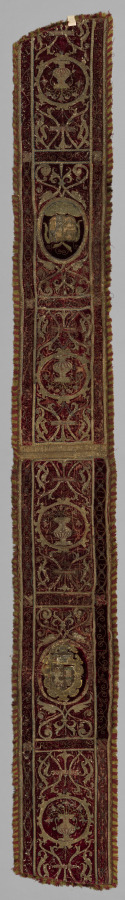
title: Embroidered Strip of Velvet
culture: Spain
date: 1500s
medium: embroidery: silk and gold thread on velvet, fringe border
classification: Velvet